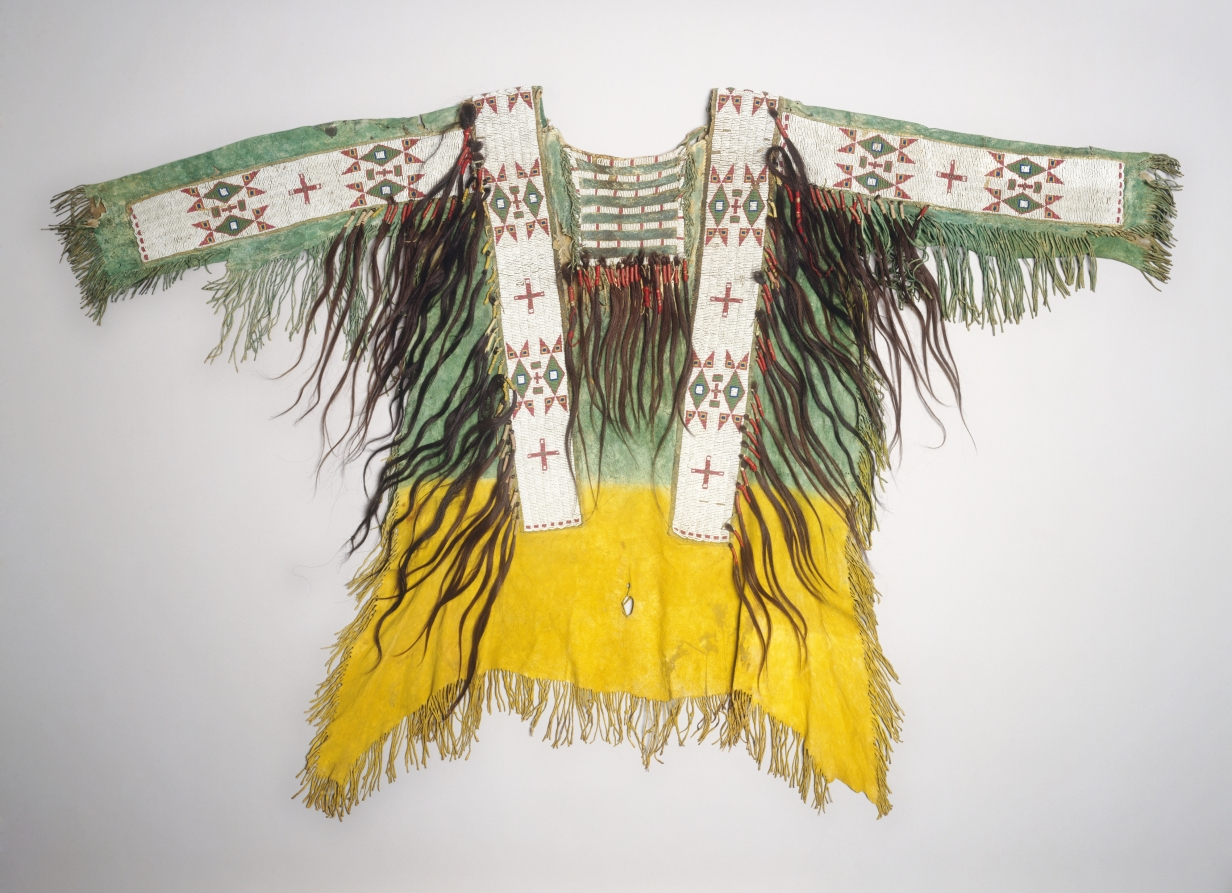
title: Hide Shirt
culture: America, Native North American, Central Plains, Lakota Sioux, 19th century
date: c. 1890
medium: hide, pigment, glass beads, human hair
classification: Textile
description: Traditionally, only Lakota (Sioux) head chiefs had the right to wear painted shirts, an honor they earned through sacrifice and bravery but lost by failing in their responsibilities. By the time this example was created, European Americans had confined the Lakota to reservations, and painted shirts had become the privilege of battle veterans rather than of active warriors. Family members probably donated the locks of hair, each representing a war exploit.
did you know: Only Lakota (Sioux) chiefs had the right to wear painted shirts, an honor they earned through bravery.